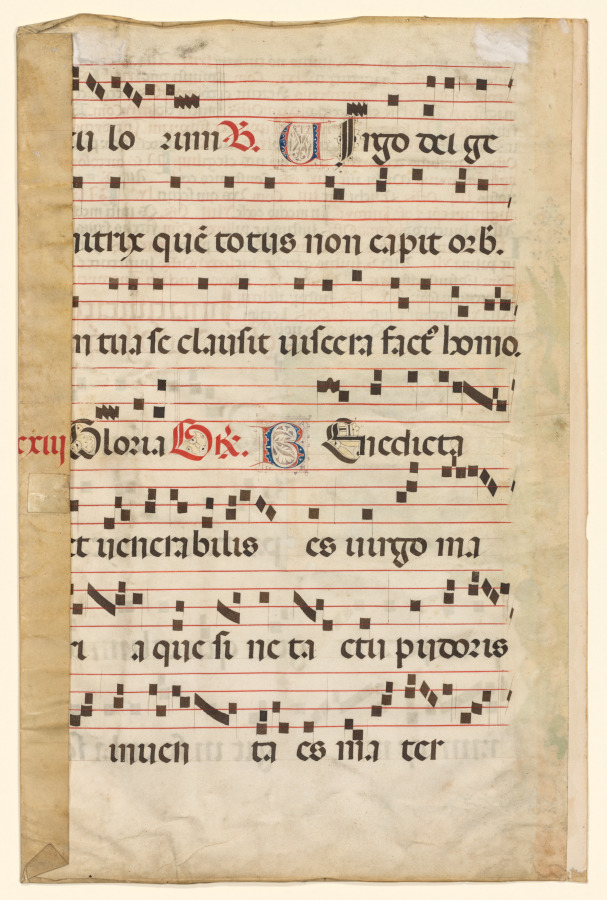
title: Leaf from a Gradual with Music (verso)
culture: Northern Italy, 15th century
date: c. 1420–1450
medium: ink, tempera, and gold on vellum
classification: Manuscript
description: In manuscript missals and their musical counterparts, the gradual, votive Masses are generally assigned one to each day of the week with Saturday reserved for the Blessed Virgin. The votive Mass to the Virgin varied from season to season. Three Masses were, therefore, supplied—one for advent, one to be used from Christmas to purification, and a third, represented by this leaf, to be used from purification to advent. This text introduces the opening of the Introit for the Saturday votive Mass for the Nativity of the Virgin (September 8) in the liturgical calendar. The identity of the artist remains elusive, as does his precise place of origin. The figure style and ornament suggest a source in North Italy, perhaps in an artistic center such as Pavia, Mantua, or Padua.